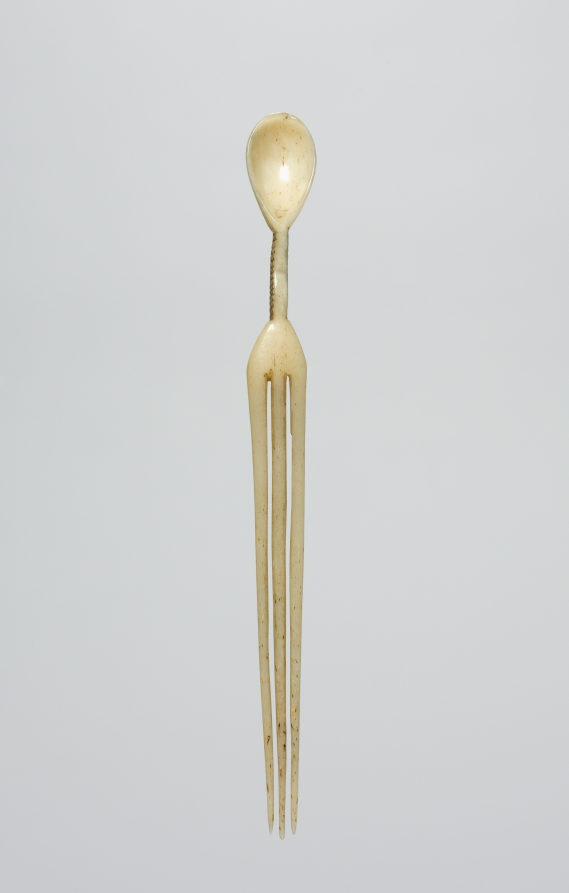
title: Snuff Spoon/Comb (intshengula or izintshengula)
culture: Africa, Southern Africa, South Africa, Zulu-style maker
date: late 1800s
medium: Bone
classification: Sculpture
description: Often, snuff spoons made from the rib of an ox or cow were subtly carved to suggest a female body. Decorated with incised designs blackened with cattle fat and ash, many are true hybrid objects, combining a spoon with a long-tined comb or hairpin. Such spoons were typically worn as ornaments in the hair or even the beard, thus signaling the social standing of their wearer.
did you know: Such spoons were typically worn as ornaments in the hair or even the beard, signaling the social standing of their wearer.